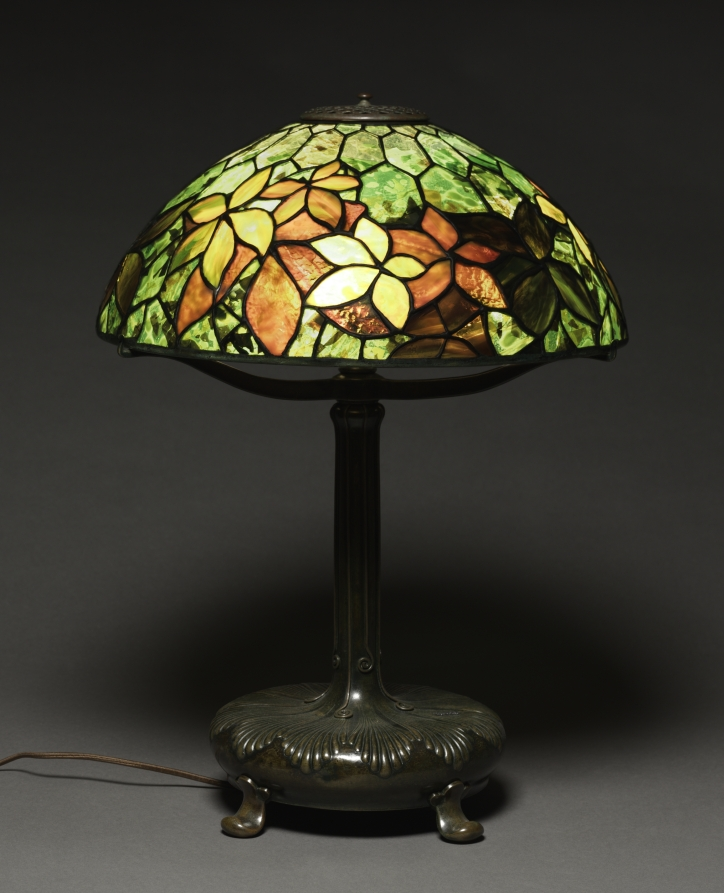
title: Woodbine Table Lamp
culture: America, New York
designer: probably by Clara Wolcott Driscoll (American, 1861–1944)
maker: Tiffany Glass & Decorating Company (America, New York, 1892–1902)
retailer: Tiffany Studios (United States, New York, 1902–32)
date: c. 1900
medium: Leaded glass, bronze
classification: Lamp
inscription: Base impressed: TIFFANY STUDIOS/NEW YORK/D805/TGDCo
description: Louis Comfort Tiffany was among those who championed lush, sometimes wild-looking displays of varied species in the garden at his Long Island estate, Laurelton Hall. He encouraged his designers to take inspiration from his garden by shipping fresh cuttings almost weekly to his studios. Ohio native Clara Wolcott Driscoll and her team of female designers created floral and leafy patterns for lamps and mosaics that became among the most sought after and commercially successful of Tiffany’s production.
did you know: This shade features confetti glass, a technique in which colored shards are dropped into the molten mixture to resemble trapped pieces of paper or confetti.